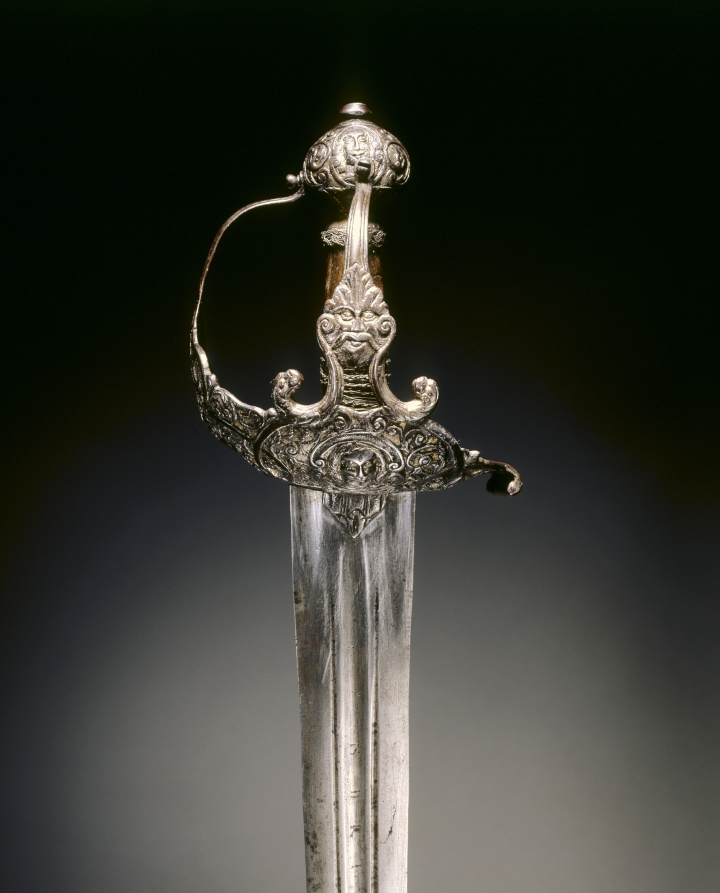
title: Basket-Hilt Broadsword ("Mortuary Sword")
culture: Hilt: England; Blade: Germany, Solingen (?), Hilt: 17th Century; Blade: 18th Century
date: hilt: c. 1640–50; blade: 1700s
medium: steel, chiseled; inlaid gilt- silver foil; wood and wire grip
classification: Arms and Armor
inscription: ANDRIA FERRARA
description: The decoration on this sword's hilt includes an image of King Charles I of England (beheaded in 1649). Because the image resembles the king's death mask, this sword is known as a "mortuary sword." It may have belonged to Sir Thomas Fairfax, a general of the Parliamentary cavalry during the English Civil War (1642-51). Large, double-edged broadswords, designed for heavy cavalry use, were common from the 1600s through the 1800s.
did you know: The ornate basket hilt which protects the hand, is chiseled with leafy decorative scrollwork and grotesque masks.